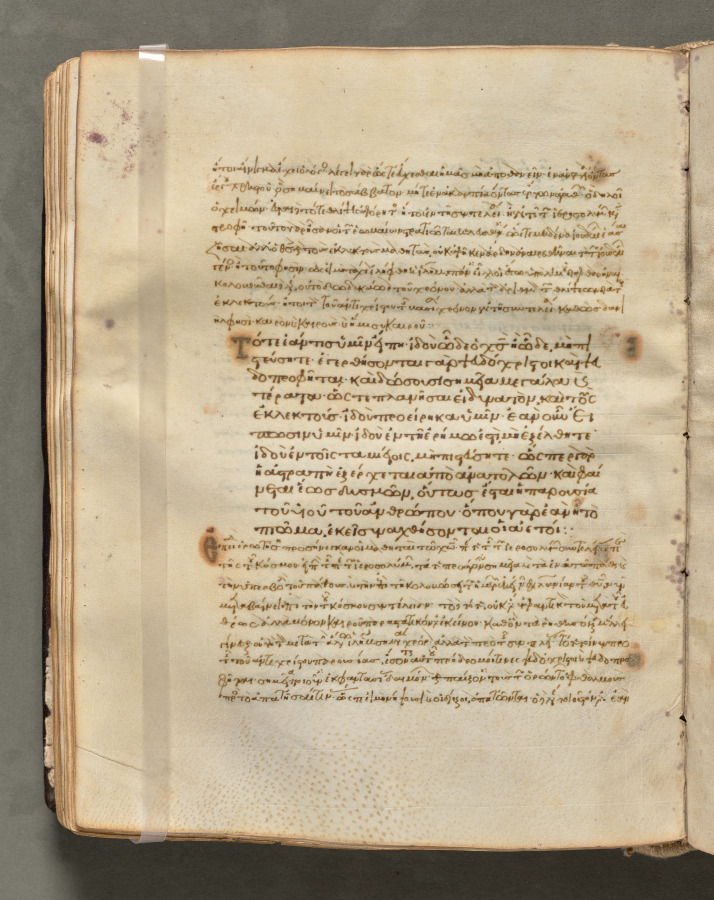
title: Text, folio 106 (verso), from a Gospel Book with Commentaries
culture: Byzantium, Constantinople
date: c. 1000–1100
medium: ink, tempera, and gold on vellum; leather binding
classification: Bound Volume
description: Each of the four gospels in this book opens on a page with brilliantly illuminated borders depicting the author of the text as well as birds-principally peacocks, symbols of the immortality of the soul-and fountains, representing the fountain of life and the salvation of the soul. This volume consists of 428 leaves with texts in Greek. Its level of sophistication suggests that it was probably written and decorated in a monastery in Constantinople.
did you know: Gospel Books were carried in procession through Byzantine churches.